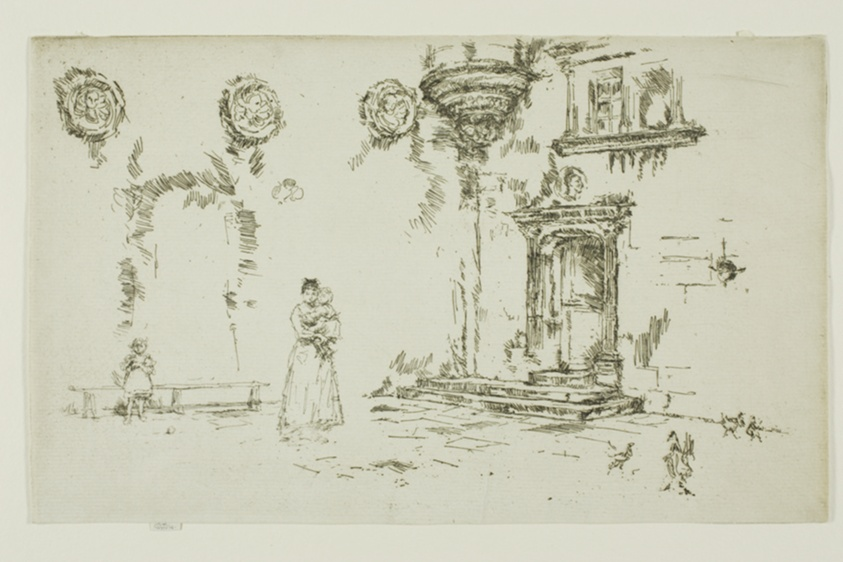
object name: Print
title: Hôtel Lallemont, Bourges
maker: James McNeill Whistler (American, 1834-1903)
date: 1888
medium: Etching and drypoint with foul biting in black ink on ivory laid paper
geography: United States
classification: etching; foul biting; print; prints and drawing; drypoint; paper